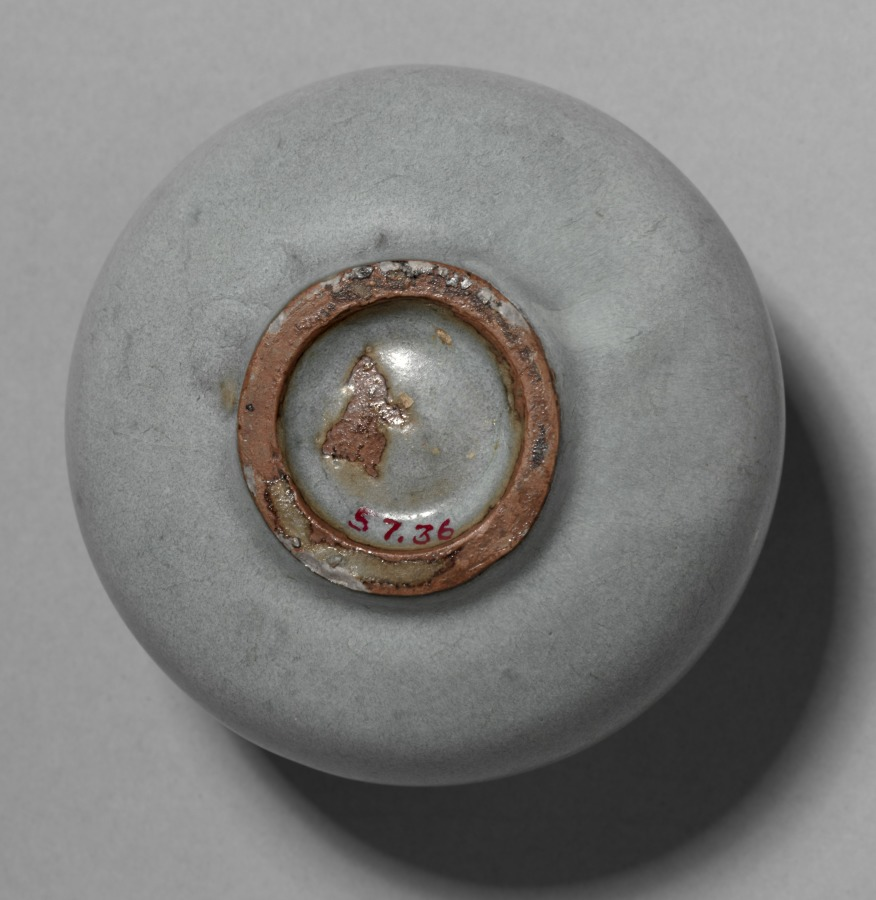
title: Jar with Cover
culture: China, Henan province, Yuxian, Northern Song dynasty (960-1127) or Jin dynasty (1115-1234)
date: 1100s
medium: porcelaneous stoneware with blue glaze and splashes of purple, Jun ware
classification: Ceramic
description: The beauty of Jun ware lies in its spectacular glaze effects, which provide immediate visual appeal. The glaze that is thickly applied onto the heavily potted body also lends the vessel a sense of volume. As shown here, its glaze colors range from soft milky-blue to rose-purple. The purple suffusions are created by splashing or brushing copper-rich pigments onto the glaze before firing. The merging of purple splashes with opalescent blue glaze displays rich tonal variations, resembling purplish glows at sunset.